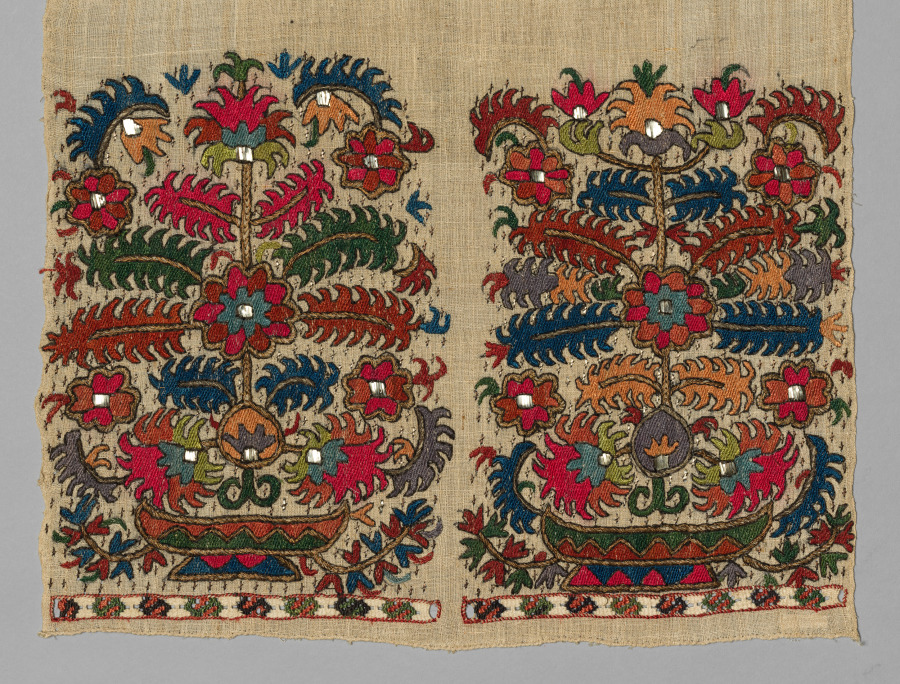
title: Towel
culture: Greece, Sporades Islands, Skyros, 18th century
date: 1700s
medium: embroidery in silk, gold and silver threads on natural linen ground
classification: Embroidery